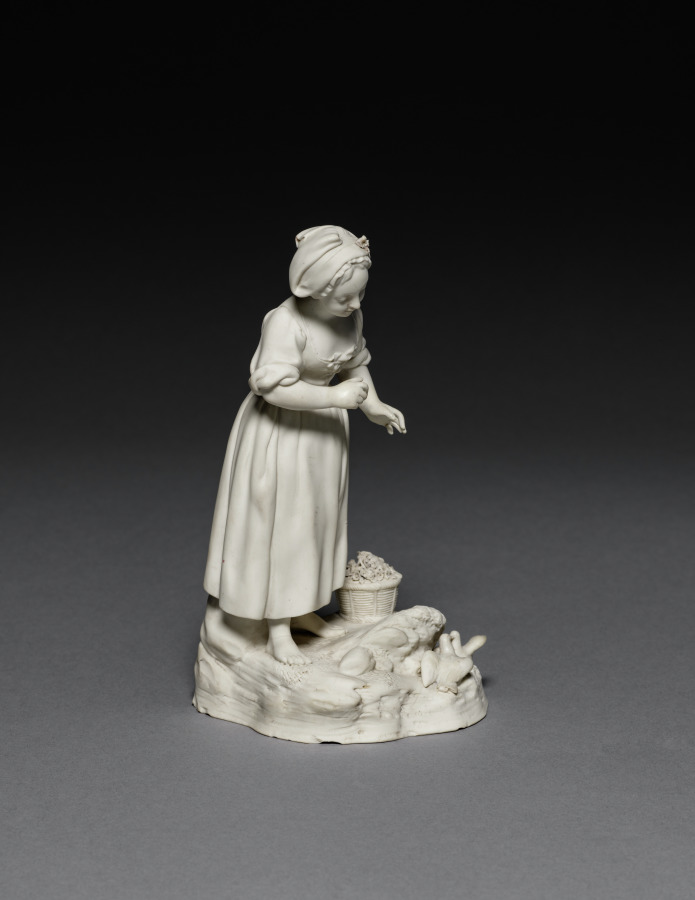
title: Curiosity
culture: France, Lunéville, 18th century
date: c. 1770–1775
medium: pipe clay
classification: Ceramic